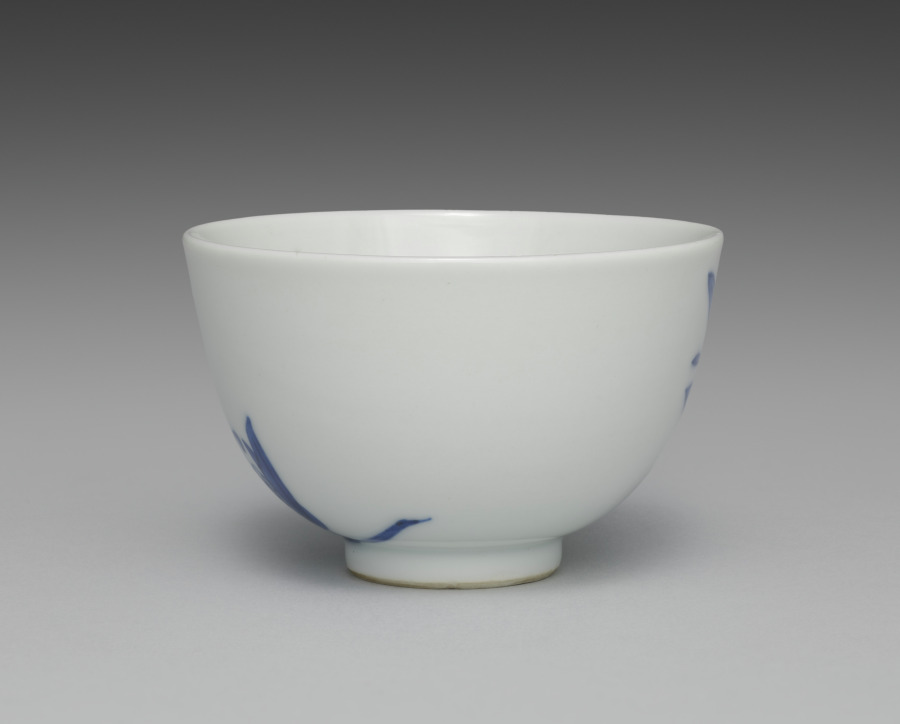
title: Teacup from Tea Set with Orchids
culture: Japan, Meiji period (1868–1912)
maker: Seifū Yohei III (Japanese, 1851–1914)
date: c. 1893–1914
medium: Porcelain with underglaze blue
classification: Ceramic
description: Although the teapot here is stored in a separate box from the five cups, these six pieces may once have been part of a tea set that included other tools such as a water cooler. The teacups have orchid flowers on both sides in underglaze blue, as well as a blue band inside the footring. The teapot has the same design and a blue band painted around the bottom of the lid’s knob. The cups’ long wood storage box is stamped on the exterior, over the lid and base, with a small red seal reading “Satō.” The same seal appears on five small squares of yellow textile, one placed in the bottom of each compartment in the teacup storage box. These are additional to the customary yellow cloths stamped with a “Seifu” seal. Interestingly, four of the Seifū cloths are stamped with an ovoid seal, while the remaining cloth, which is a slightly lighter color, has an unusual seal that is not quite gourd-shaped and with the fū of Seifū in a stylized, unrecognizable form. The teapot has its own box with a Satō seal and is wrapped with an orange textile stamped with the same unusual Seifū seal. A set with a very similar surface design is in the Brooklyn Museum. The Brooklyn set has a water cooler and a small pitcher, in addition to the teapot and cups, and all are in a single storage box. This box records the tea tools as made with kanpakuji, or “bright-jewel white porcelain,” counted among Yohei III’s most important inventions, and carved images. In fact, both sets have a white surface much closer in coloration to the cool white of porcelain clay used in Kyoto at the time, and the designs are simply painted. The Brooklyn set was thus likely mismatched at some point with a box intended for another tea set. Nonetheless, the box may have helped prevent the set’s original components from being dispersed, and the set itself provides insight into how the other tools from the present set may have looked.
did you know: This tea set with orchids has a side-handled pot called a kyūsu, used for steeping, straining, and serving tea.